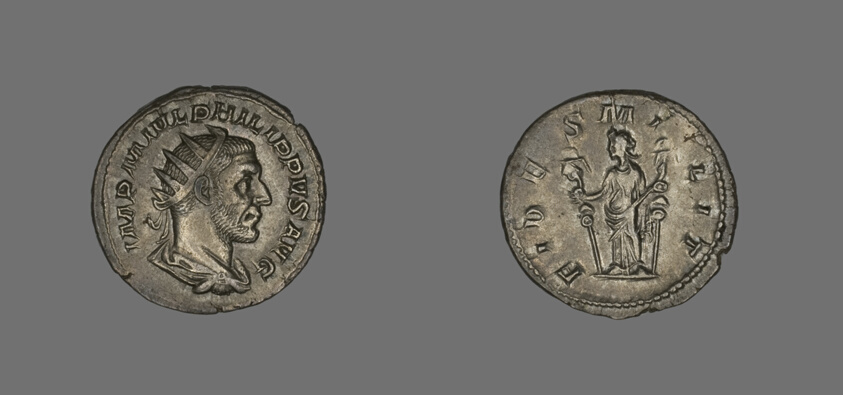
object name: Coin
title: Denarius (Coin) Portraying King Philip II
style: roman (ancient, style or period)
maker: Roman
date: 244-247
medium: Silver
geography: Rome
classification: coin; ancient art